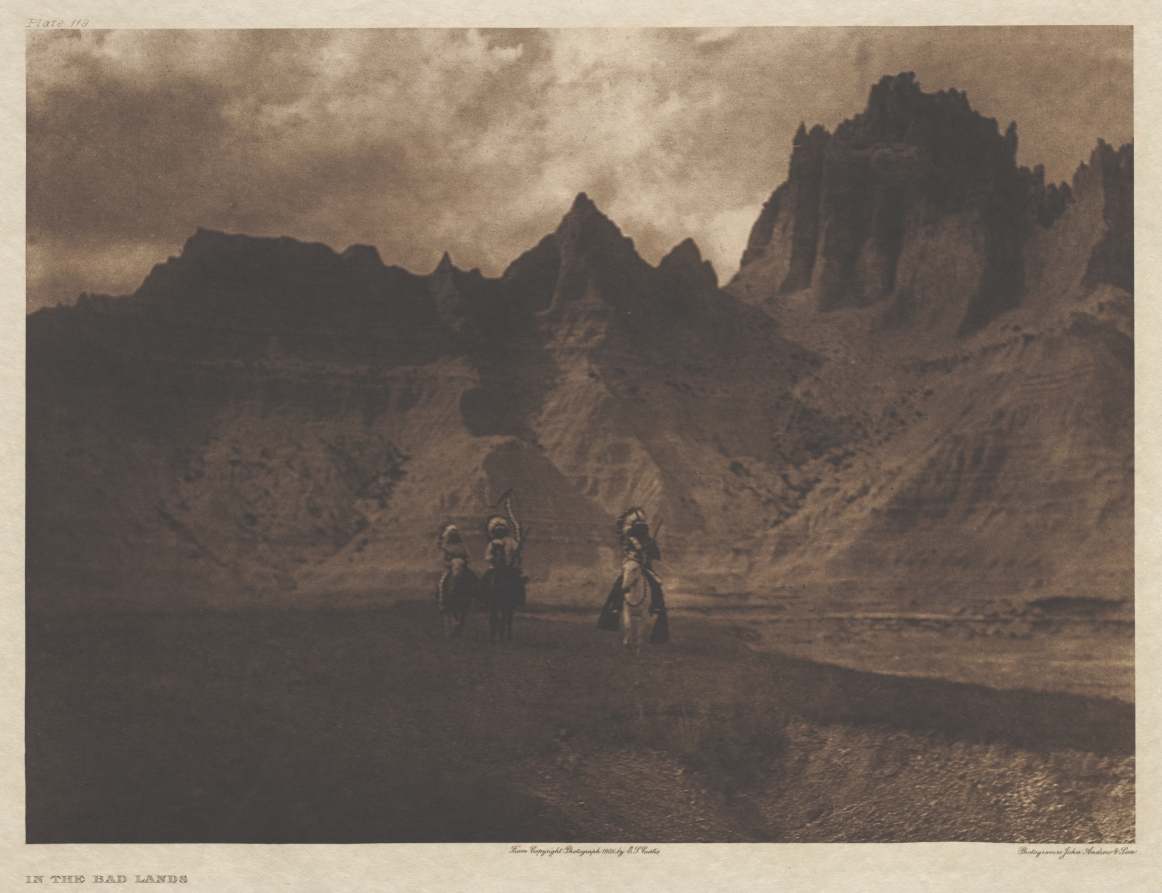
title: Portfolio III, Plate 119: In the Bad Lands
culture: America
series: The North American Indian: being a series of Portfolios picturing and describing the Indians of the United States, the Dominion of Canada, and Alaska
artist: Edward S. Curtis (American, 1868–1952)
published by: The University Press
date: 1904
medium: photogravure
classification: Portfolio